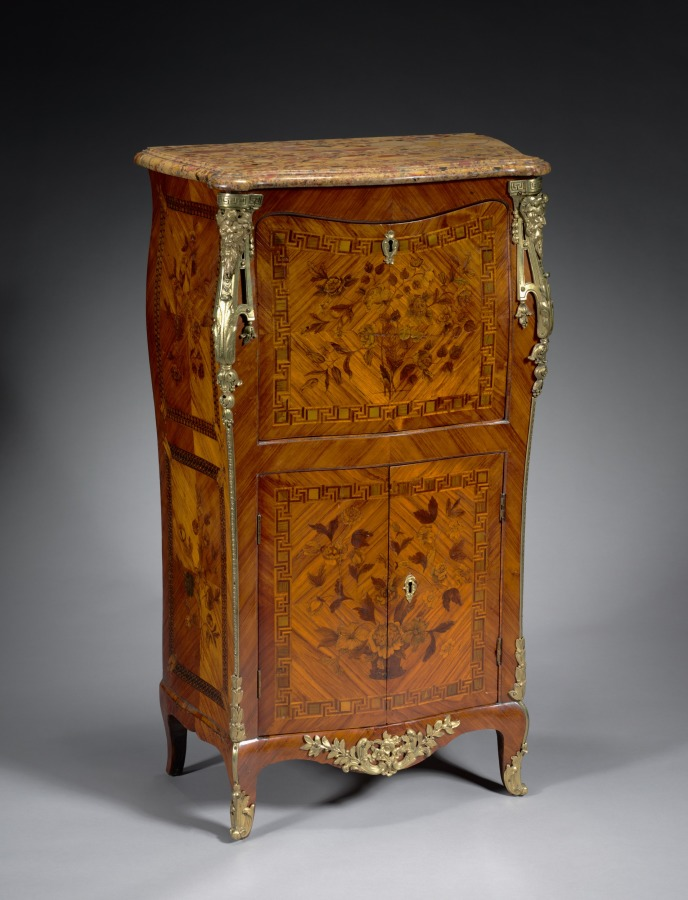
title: Fall-front Secretary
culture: France, 18th century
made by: attributed to Leonard Boudin (French, 1735–1804)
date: c. 1765– 1775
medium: wood marquetry, gilt bronze mounts, marble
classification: Furniture and woodwork